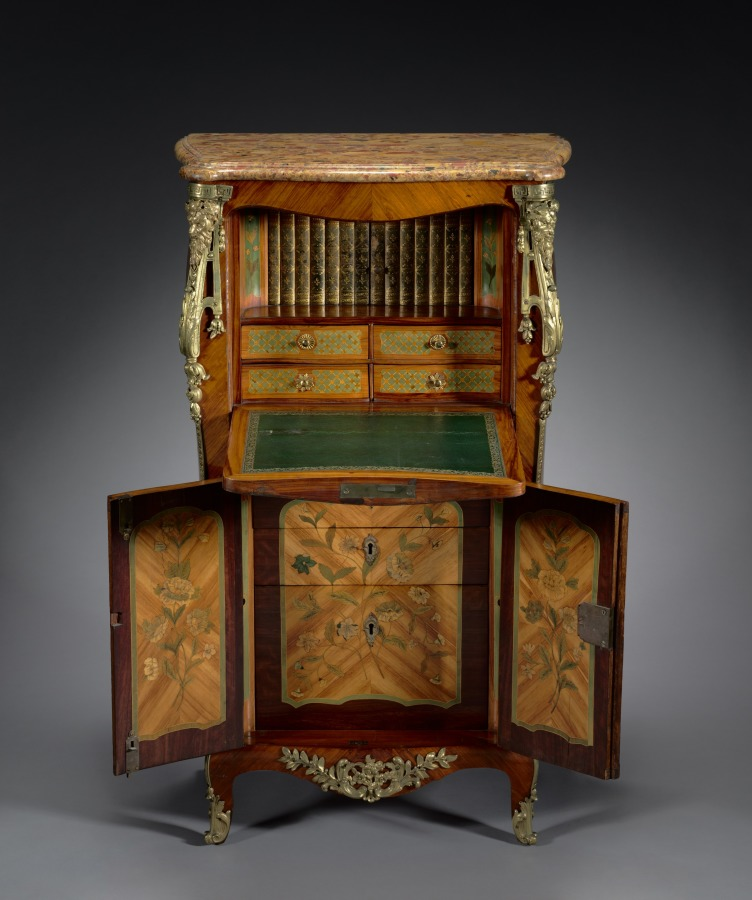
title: Fall-front Secretary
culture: France, 18th century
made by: attributed to Leonard Boudin (French, 1735–1804)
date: c. 1765– 1775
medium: wood marquetry, gilt bronze mounts, marble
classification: Furniture and woodwork